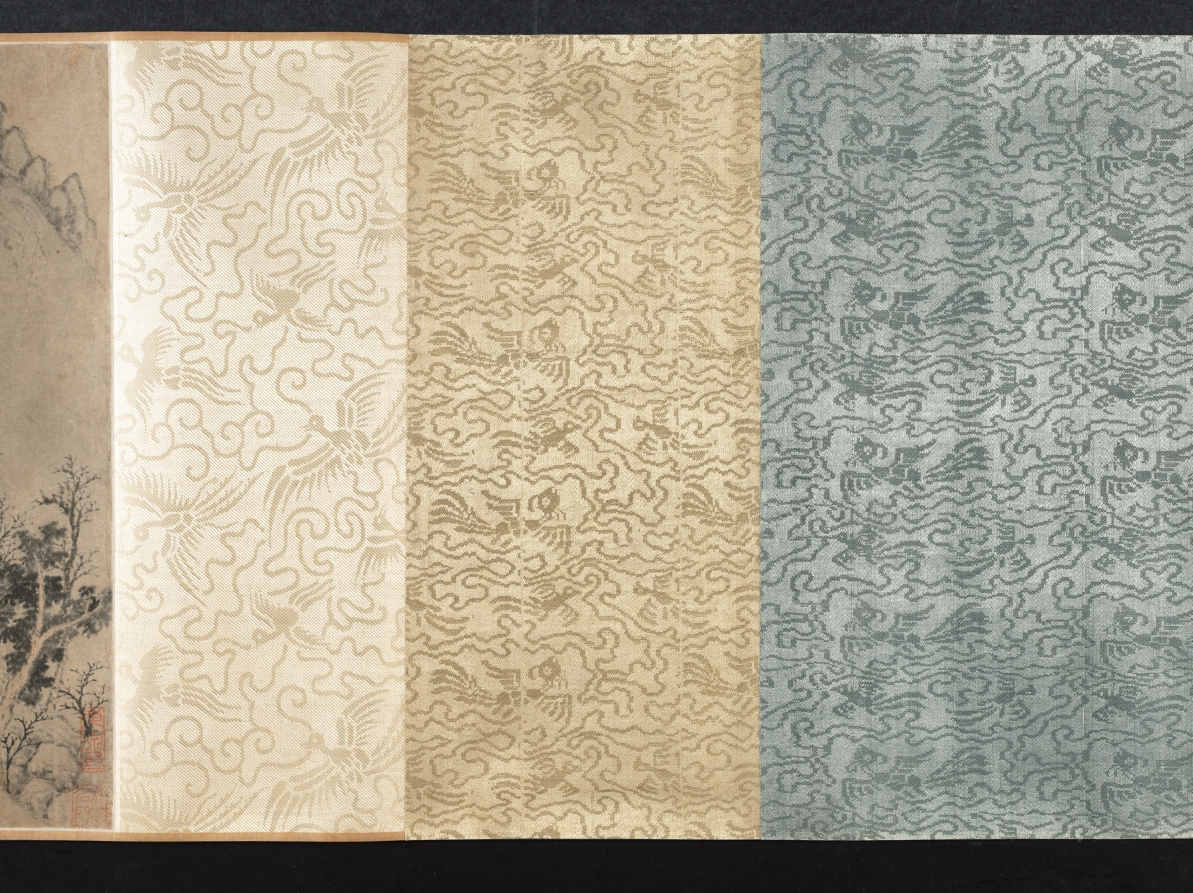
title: Mt. Taibo in the Style of Wang Meng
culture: China, Ming dynasty (1368–1644)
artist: Du Qiong (Chinese, 1396–1474)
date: 1442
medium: handscroll; ink and light color on paper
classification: Painting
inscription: Artist's inscription, signature, and 11 seals: [1 seal] Tung-yüan chai. Huang-ho-shan-ch'iao [Wang Meng] painted a painted called T'ai-po Mountain. Its brushwork is superior and admirable, which is very close to Yu-ch'en [Wang Wei, 699-759]. The cleverness of its composition, the maple groves and rustic temples, the inaccessible ravines and autumnal plateaus, the periolous peaks and strange rocks, etc., all seem to be so natural. The paper is only a little over eight feet, but the landscape has the range of a thousand miles. Once you open and note the contents, it is as if one were roaming among the mountain peaks enveloped in mist and clouds, and forgot the dusty world. When I first saw this, I was so mixed with excitement and joy that I could not take my hands off the painting. So I put it on the table, and tried my best to imitate it, forgetting sleeping and eating for about three months before it was completed. Although I do not dare to tread in the footsteps of Huang-ho shan ch'iao, I took great pains to capture his spirit in composition and colors. I do not know whether it would pass the judgment of the experts. On the fifteenth day of the fifth month, the seventh year of the Cheng-t'ung year [1442], inscribed by Tung-yüan, Tu Chiung. [2 seals] Yung-chia; Ching-chieh ming-men. [8 seals on painting] Tung-yüan chai; Ching-chieh ming-men; Yung-chia; Tu Ch'iung yin; Tung-yüan (repeated 5 times). trans. WKH/LYSL 3 colophons and 7 additional seals: 1 colophon and 2 seals of Chou Ting (1401-1487); 1 colophon and 2 seals of Wu K'uan (1435-1504); 1 colophon, dated 1655, and 2 seals of Lan Ying (1585-after 1664).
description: When a Chinese painter "imitated" a painting by a past master, the intention was never to produce an exact copy. Du Qiong, the Ming painter from Suzhou, is a case in point. The painting style of this handscroll is actually closer to that of Huang Gongwang (1269–1354) than to the style of Wang Meng (about 1301–1385). Both masters were active during the previous dynasty and are among the so-called Four Great Masters of the Yuan dynasty (1279–1368). In this painting, the interplay of styles, including Du Qiong's own, contribute to an inner dimension that is more than visual. Mt. Taibo is located in the province of Zhejiang and is known for its scenic beauty. In this scroll, however, it is not depicted literally. The image is an ideal representation of mountains in southeastern China.